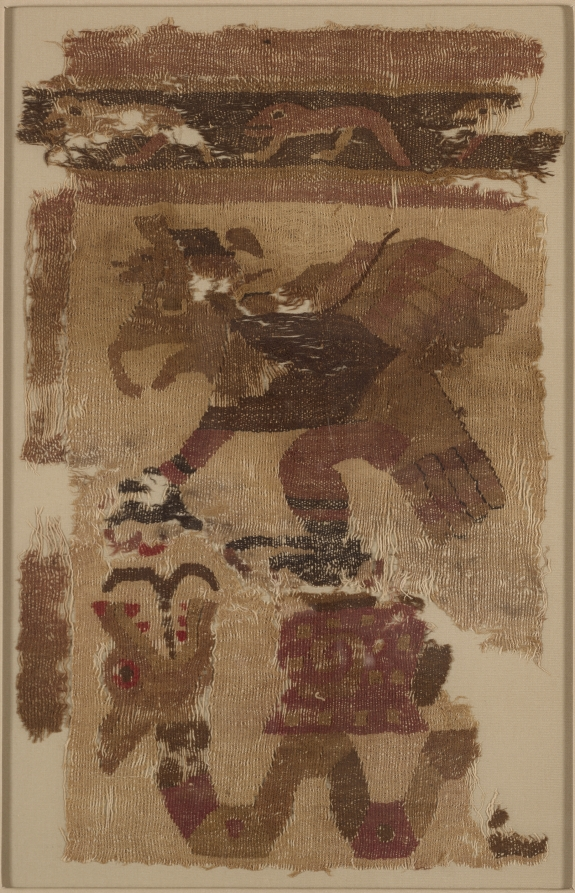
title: Textile Fragment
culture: Peru, Moche, north coast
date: c. 50–650 CE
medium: cotton and camelid fiber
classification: Textile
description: This fragment, one of several in the collection, is a rare survivor of catastrophic rains that destroyed much of the Moche textile legacy and may have helped to bring about the decline of Moche culture. It depicts a serpent and a snail beneath a hovering raptorial bird—perhaps a snail kite, a type of hawk named after its favored food. The size of the motifs implies that the original textile was large; a mantle (a shawl-like garment) or a hanging are among the possibilities.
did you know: This fragment is a rare survivor of floods that destroyed much of the Moche textile record.